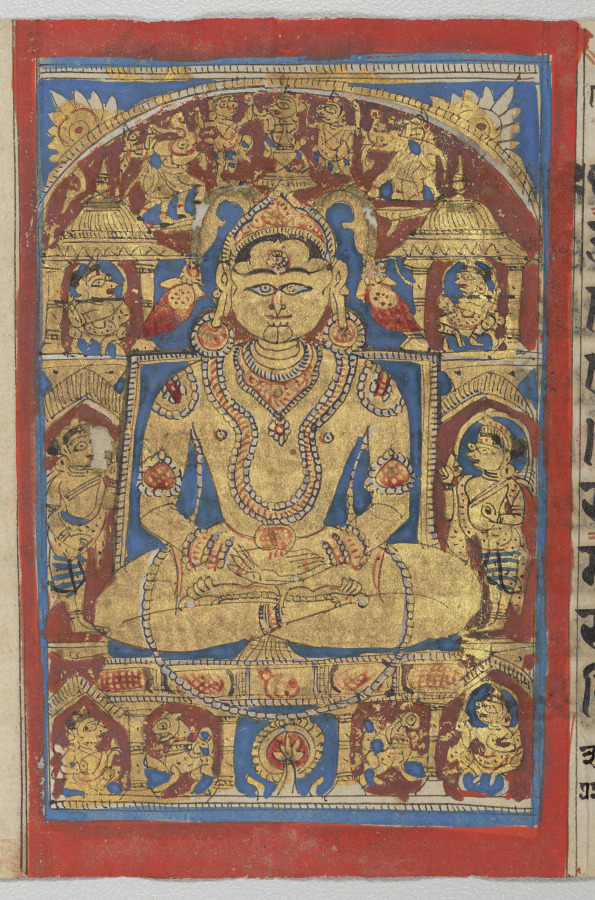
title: Nemi Enthroned, Folio 54 (verso), from a Kalpa-sutra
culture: Western India, Gujarat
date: c. 1475–1500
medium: Gum tempera, ink, and gold on paper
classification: Painting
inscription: [[upper left]] Śrī Āriṣṭanemi (?)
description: Followers of the Jain religion recognize 24 Jinas, individuals who reached liberation from the cycles of death and rebirth. Arishtanemi was the 22nd of the 24 and was a cousin of Krishna. Here Arishtanemi sits in eternal meditative bliss, crowned and bejeweled in a shrine. His attendants are sometimes recognized as the Hindu deities Krishna and Balarama. Followers of the Jain religion do not view Krishna as a supreme deity; instead, they view him and his brother Balarama as semidivine heroes with access to the liberated being.